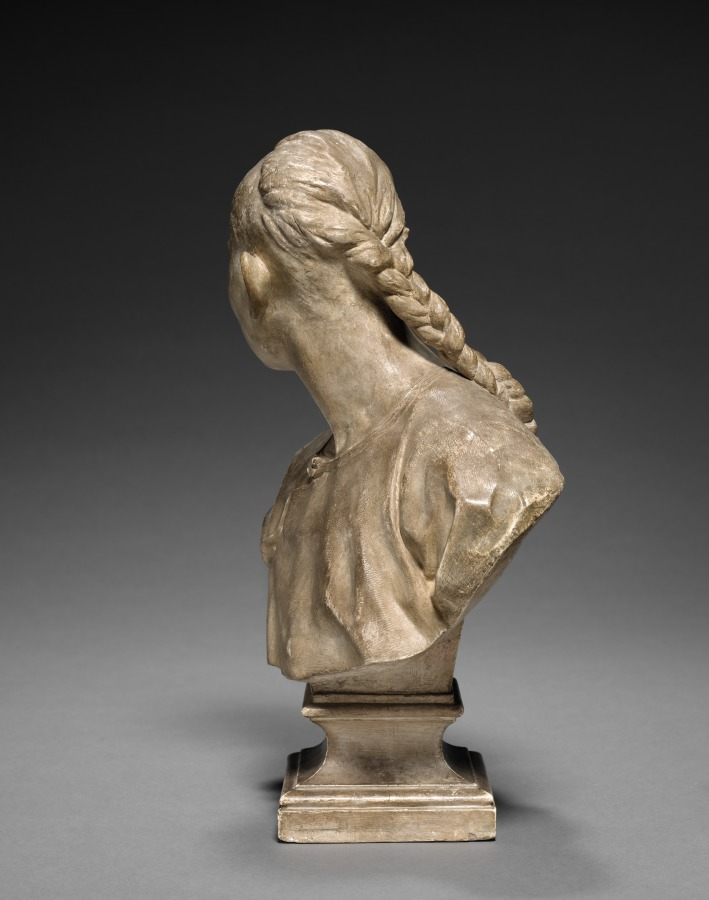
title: Bust of a Chinese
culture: France, 19th century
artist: Jean-Baptiste Carpeaux (French, 1827–1875)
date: 1867–68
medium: plaster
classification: Sculpture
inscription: inset into bust near base at rear is struck copper plate inscribed: "PROPRIETE CARPEAUX" with an eagle in the center.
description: This bust is related to the allegorical figure of Asia in Carpeaux's monumental bronze fountain, The Four Parts of the World Upholding the Celestial Sphere, commissioned by Baron Haussmann in 1867 for the Luxembourg Gardens in Paris. The figure was changed into a woman in the fountain and reflects the artist's interest in accurately portraying different ethnic groups. This bust exists in various sizes and media.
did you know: Greatly admired during his time, Jean-Baptiste Carpeaux received important commissions from French Emperor Napoleon III and Baron Georges-Eugène Haussmann.